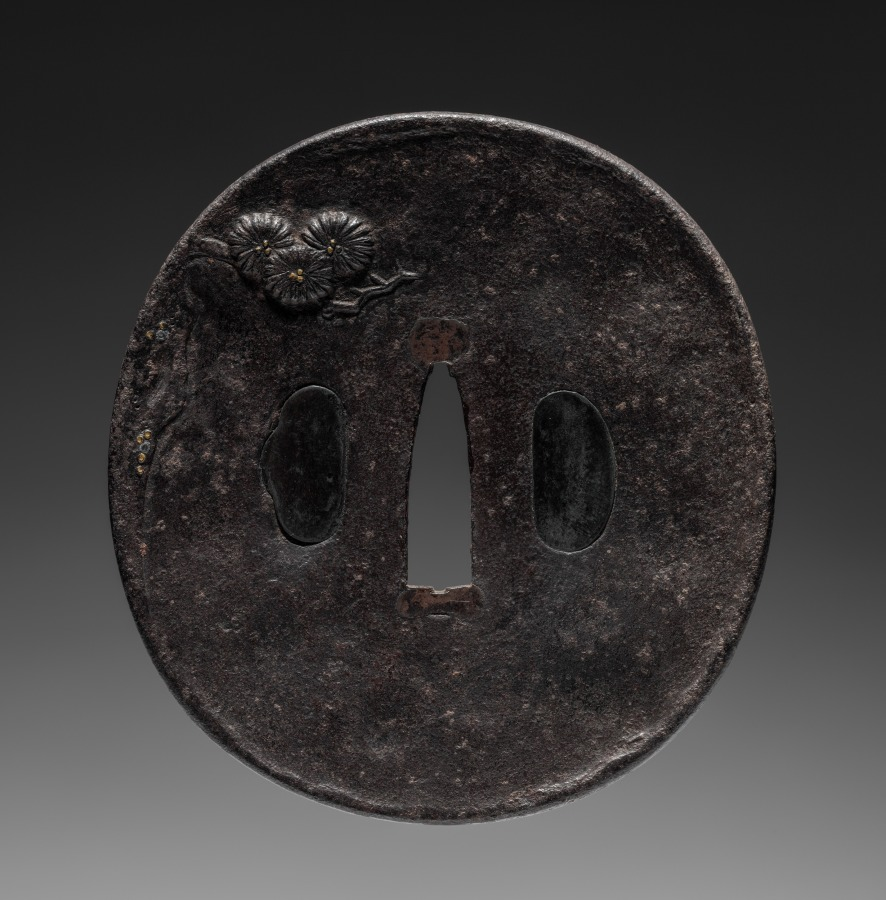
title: Sword Guard (Tsuba) with Zhong Kui (Shoki) the Demon Queller and Pine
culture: Japan, Edo period (1615–1868)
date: 1615–1868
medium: iron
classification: Arms and Armor